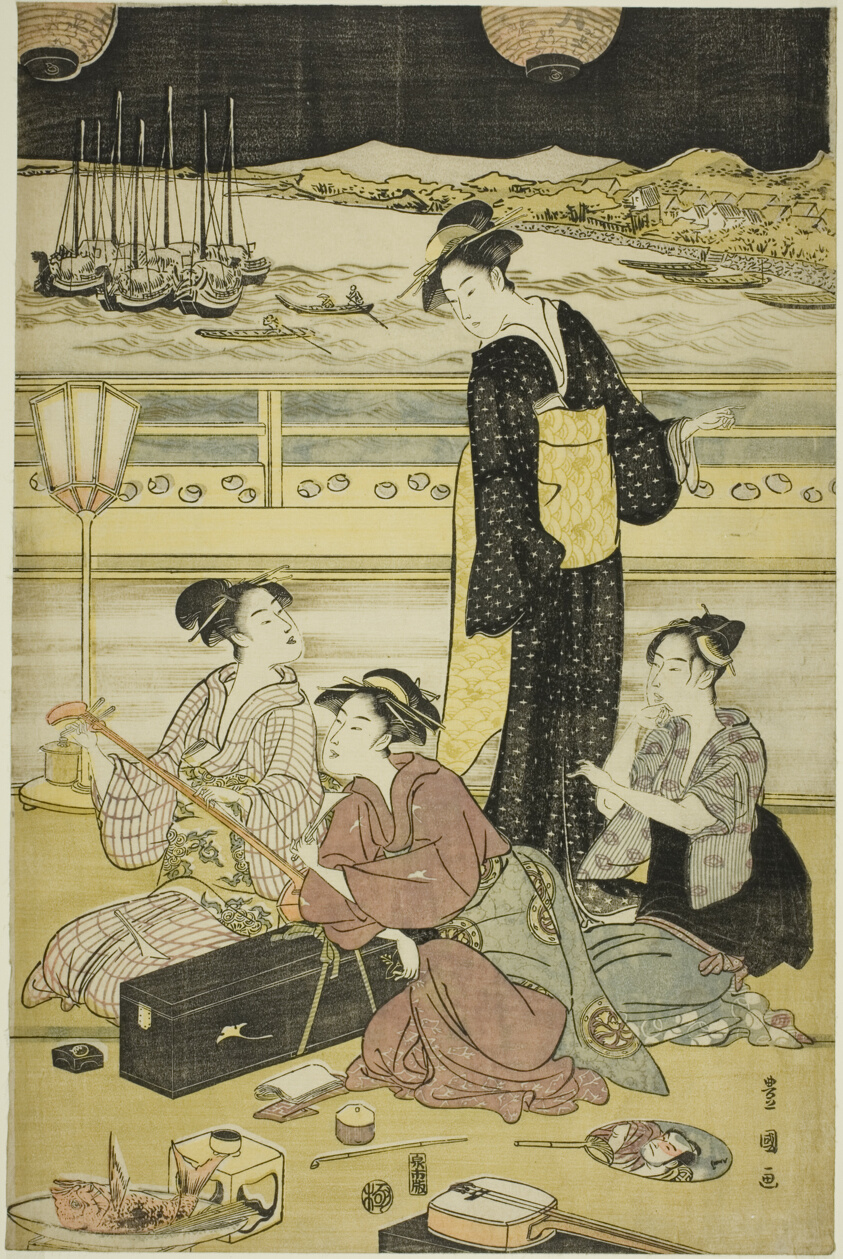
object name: Print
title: Evening party at Shinagawa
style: Japanese (culture or style)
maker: Utagawa Toyokuni I 初代 歌川 豊国; Japanese, 1769–1825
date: c. 1790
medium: Color woodblock print; right sheet of oban triptych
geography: Japan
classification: woodblock print; print; asian art